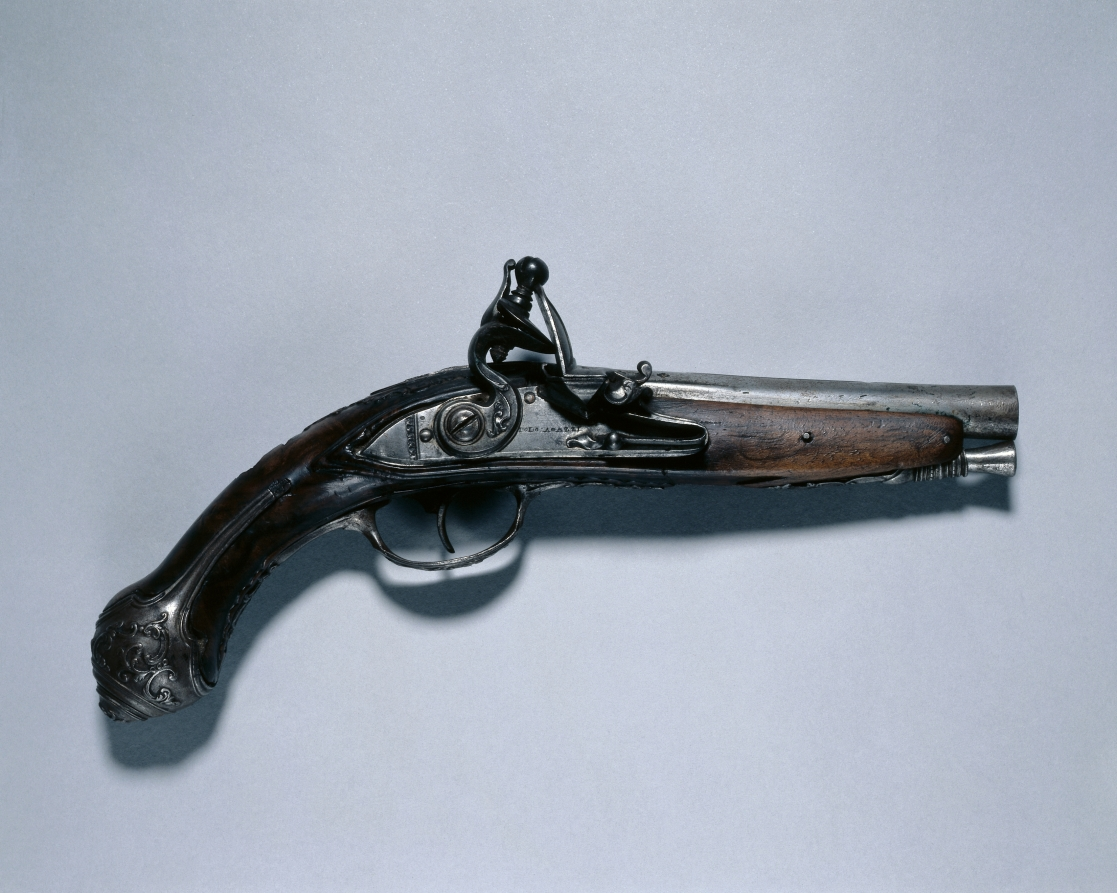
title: Flintlock Pistol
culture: Italy, Brescia, 18th century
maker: Bortolo Agazzi (Italian)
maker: Lazaro Lazarino (Italian)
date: 1700s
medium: steel with traces of gilding; walnut stock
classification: Arms and Armor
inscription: on lock: Bortolo Agazzi; on barrel: Lazaro Lazarino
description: The flintlock was the most popular style of lock in all of Europe in the mid 1600s through the 1700s except in Spain and Italy where the snaphance was more dominant. This pistol's shine comes from the gold that was applied to the steel shaft. This shiny surface is set off by the rich walnut stock. Upon close inspection, you can see areas of damage to the walnut and even a missing section of decoration on the rear of the handle.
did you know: The term flintlock is used to describe any firearm that uses a flint-striking ignition mechanism.